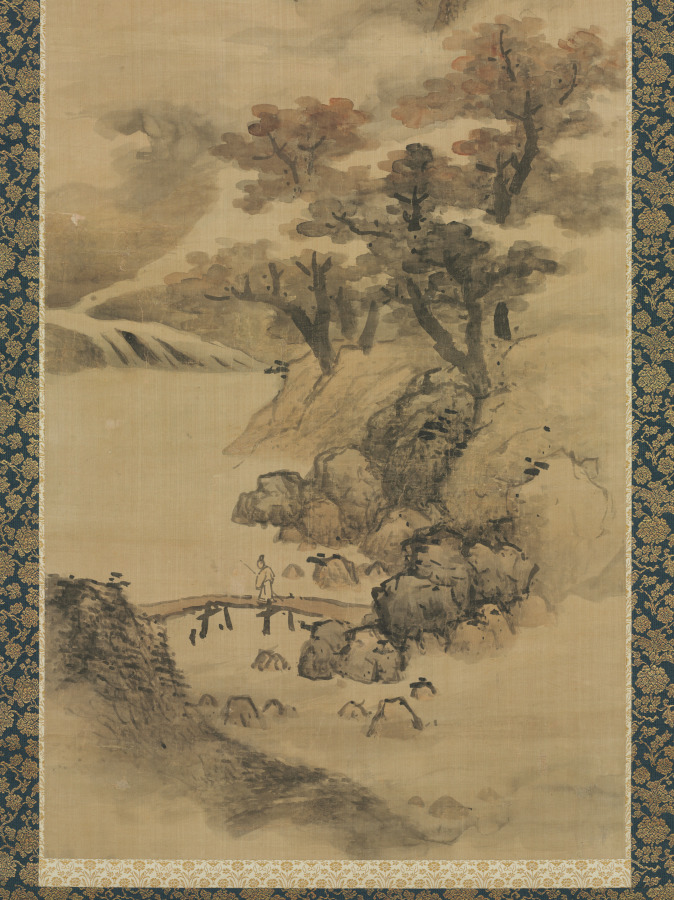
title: Clearing Autumn Mists in the Chu Mountains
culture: China, Ming dynasty (1368–1644)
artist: Lan Ying (Chinese, 1585–after 1664)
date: 1600s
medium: hanging scroll, ink and light color on silk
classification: Painting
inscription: Artist's inscription, signature, and 2 seals: Clearing Autumn Mists in the Chu Mountains, painted in the manner of Mi Haiyue [Mi Fu]. Xihu waishi, Lan Ying [seals] Lan Ying zhiyin; Shiwu toutuo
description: In his inscription Lan Yin states that he uses Mi Fu’s methods to depict this landscape. The ovoid "Mi" dots—Mi Fu’s brush idioms—are applied to give shape to the cloud-enveloped mountains and foreground tree grove for self expression. Engaging in the process of fang (imitation), he acquired the methods of various schools and masters to expand his technical range for creative transformations. Lan Yin developed his unique style and inspired major artists like Liu Du and Chen Hongshou.